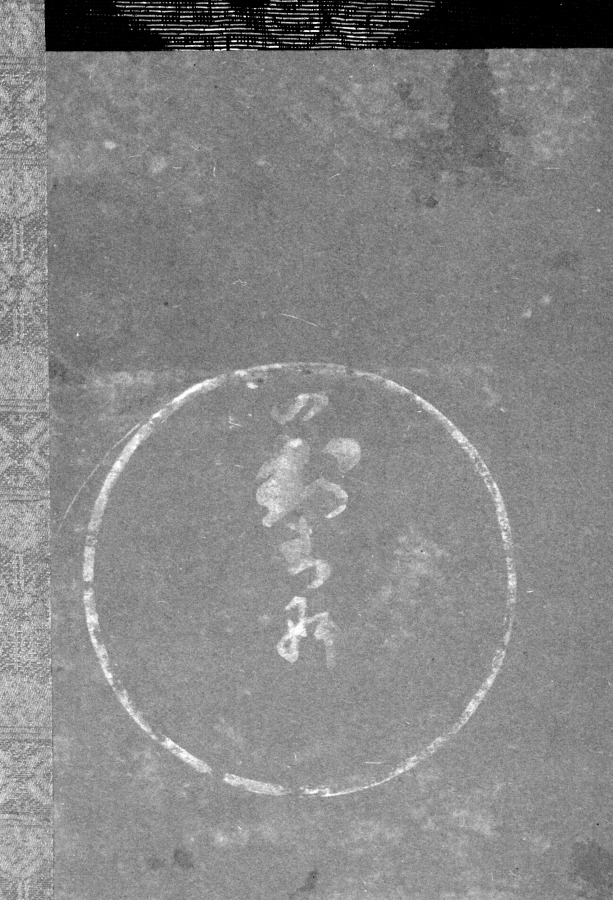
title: Puppy with Dandelions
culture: Japan, Edo period (1615–1868)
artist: studio of Tawaraya Sōtatsu (Japanese, c. 1570–c. 1640)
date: 1600–1640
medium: hanging scroll; ink on paper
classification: Painting